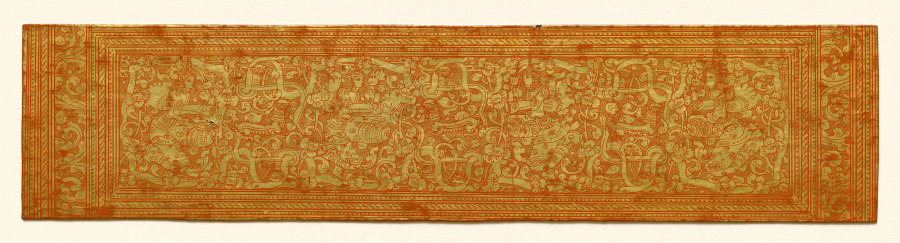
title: Illumination, folio 16 (recto) from a Kammavacha: Buddhist ordination text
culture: Myanmar (Burma)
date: 1800s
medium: Leaf: lacquer and gilding on cloth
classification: Manuscript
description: In premodern Burma, lay people commissioned lavishly ornamented manuscripts for ceremonial occasions, when officiants would read aloud from the text. Written in black lacquer, the text is in the language of Pali written in a Burmese script. It contains ordination rites and procedures for monastic ceremonies. The second to last page is covered with intricately drawn, winged celestial beings (nats) in gestures of praise. They fly amid intertwining vegetation—denoting bounty—that grows from serpentine forms that refer to rain clouds. Lionlike forms inhabit the space with them. The top and bottom covers are equally ornamented with jeweled floral patterning.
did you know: The Pali text of this manuscript is written in Burmese square script, which is also known as "tamarind seed script."